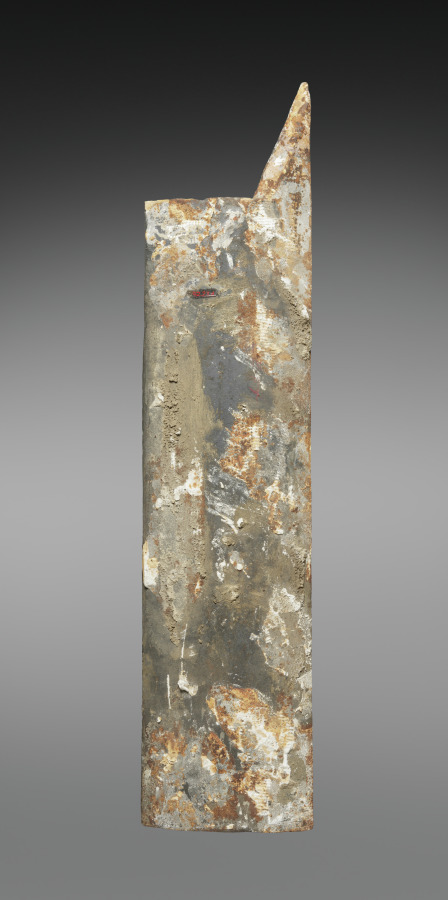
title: Set of Fire Linings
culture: France, style of Louis XVI, 18th Century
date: c. 1770–1780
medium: cast iron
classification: Furniture and woodwork